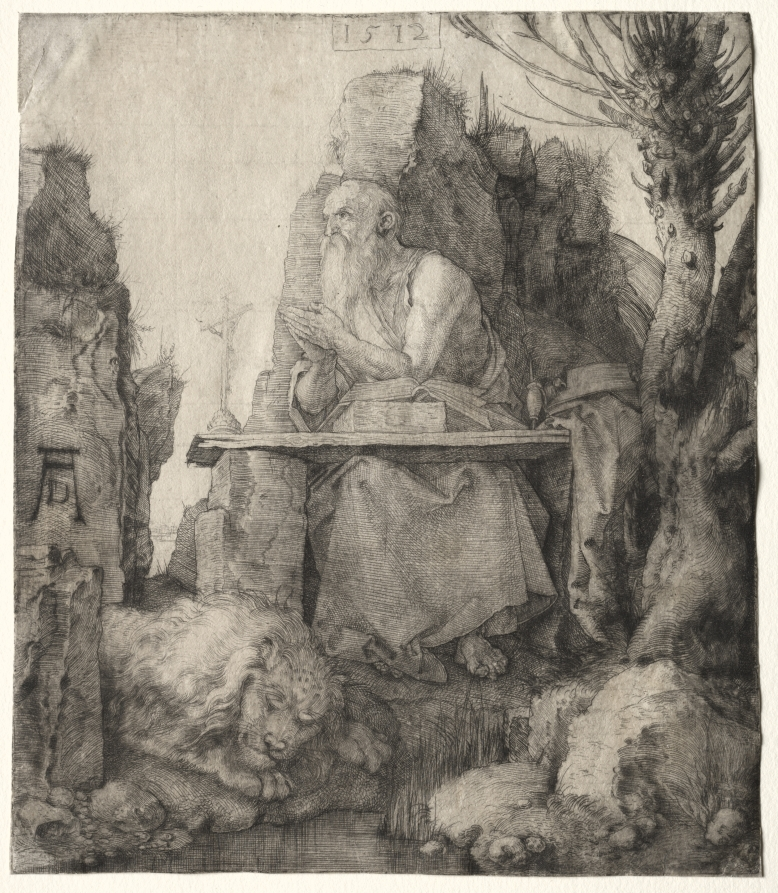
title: St. Jerome Seated near a Pollard Willow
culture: Germany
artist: Albrecht Dürer (German, 1471–1528)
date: 1512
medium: drypoint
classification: Print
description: Of the hundreds of prints Albrecht Dürer made, only three were drypoints, in which a needle scratched directly into a copperplate creates velvety, fuzzy lines. In this image of Saint Jerome, Dürer exploited these qualities of drypoint to manifest the natural, spiritual realm of the saint’s hermitage in the wilderness. Jerome pauses from his studies to pray in a setting that buzzes with life. The saint’s isolation and communion with Christ result in spiritual rebirth, symbolized by the bumpy pollard (trimmed) willow, cut to generate new growth.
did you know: This is one of only three prints Albrecht Dürer made using drypoint, in which a needle is scratched directly into the copperplate.